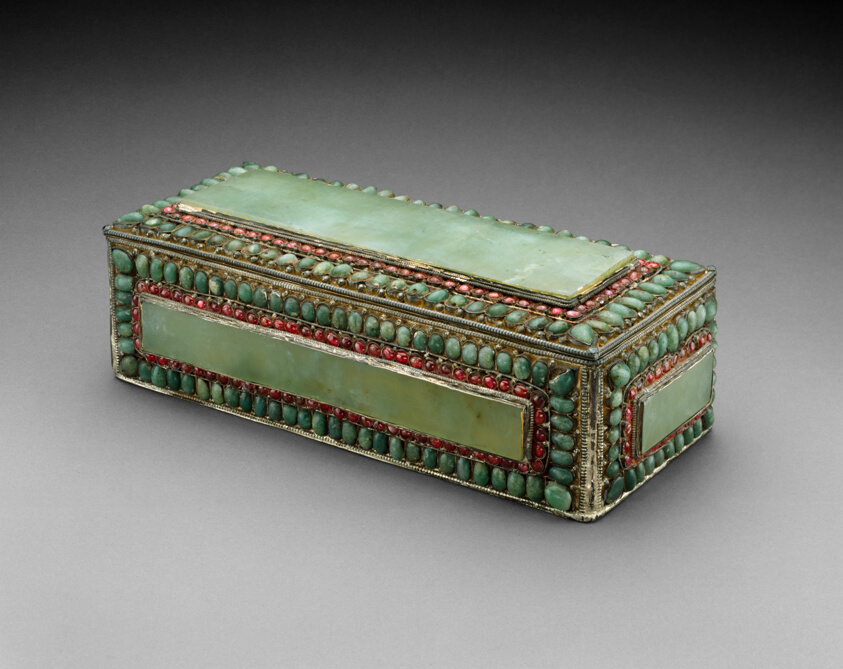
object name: Decorative Arts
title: Box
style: Himalayan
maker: Nepal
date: 19th/20th century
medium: Silver, nephrite jade, caboshon rubies, and aventurine green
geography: Nepal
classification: box; silver; metal; decorative object/ornament; asian art; decorative arts